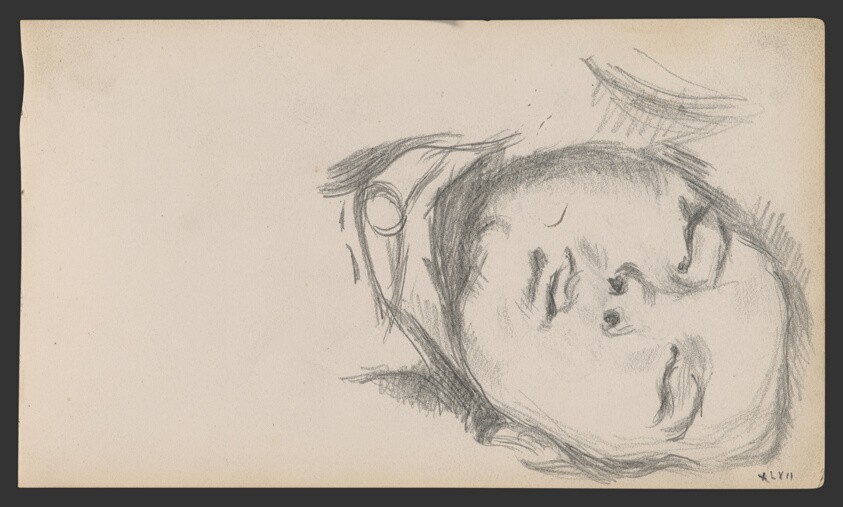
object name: Drawing and Watercolor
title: Sketchbook No. 2 (L'Estaque)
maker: Paul Cézanne; French, 1839-1906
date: 1875–86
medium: Graphite and pen and ink drawings on paper, bound into a book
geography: France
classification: sketchbook; graphite; prints and drawing; paper